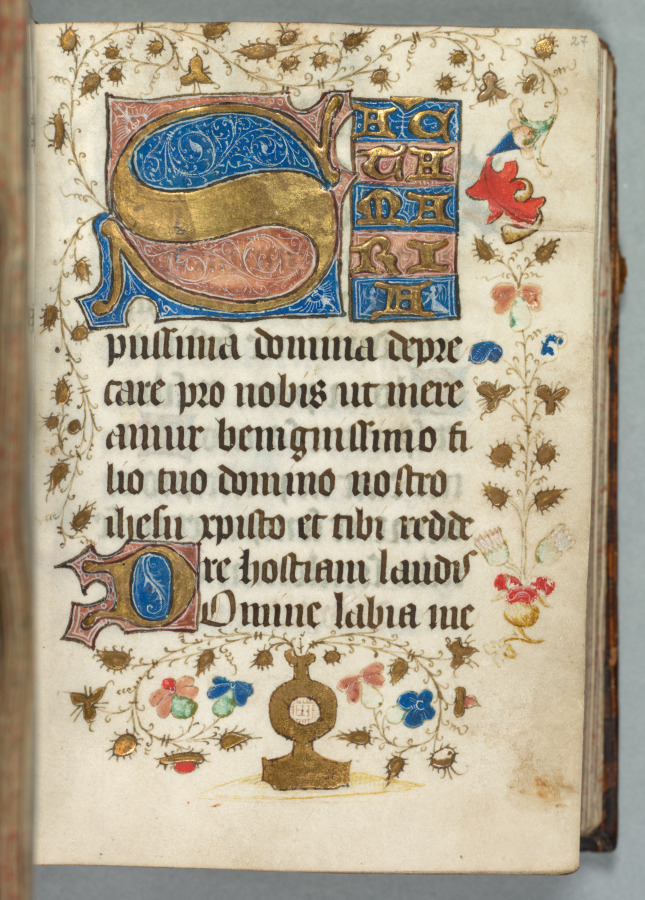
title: Book of Hours (Use of Metz): Fol. 27r, Decorated Initials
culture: France, Metz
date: c. 1440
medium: ink, tempera, and gold on vellum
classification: Bound Volume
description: This volume contains only one full-page miniature of the standing Virgin with Child. It introduces the prayer: "Holy Mary, faultless Lady, intercede for us. . . . " The first seven folios of the book list dedications of Metz churches and indulgences that are unique to that diocese. The city of Metz, situated on the Moselle River, was the cultural and commercial capital of Lorraine during the 1400s. It was also the location of an important bishopric (diocese of a bishop) and therefore the center of a growing book trade.